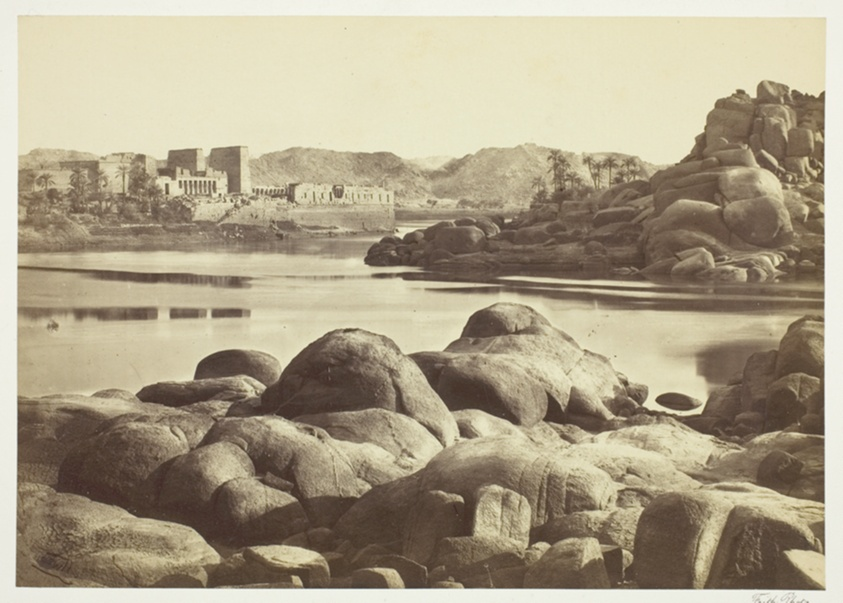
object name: Photograph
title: The Approach to Philae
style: 19th century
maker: Francis Frith (English, 1822–1898)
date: c. 1857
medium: Albumen print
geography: England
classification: albumen silver print; photographic process; photography; photograph